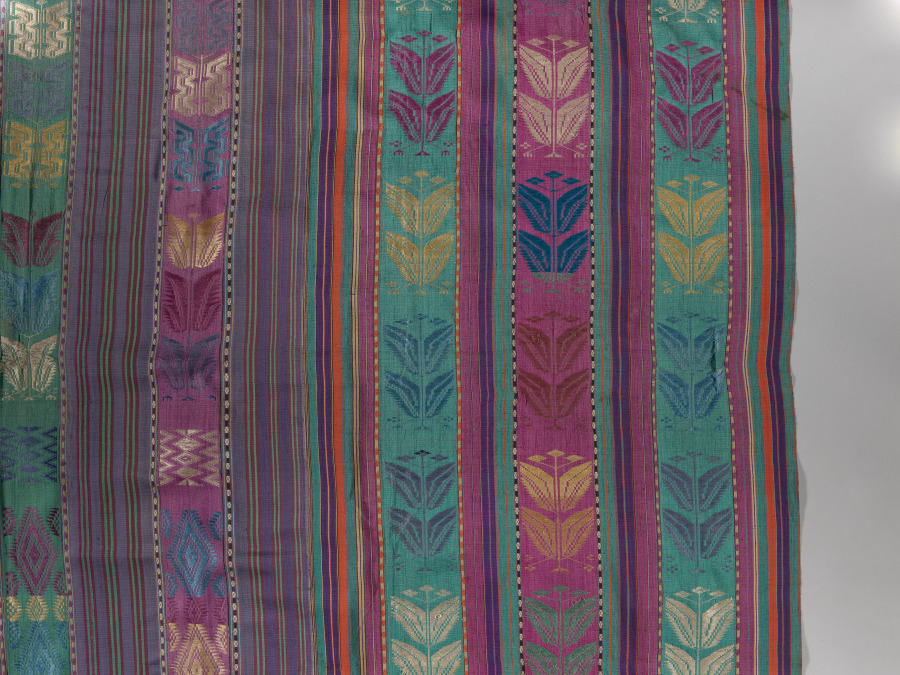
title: Wrapper (Lamba Akotifahana)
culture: Madagascar, Merina Kingdom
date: 1800s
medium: Silk (Bombyx mori)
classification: Textile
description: A lamba is an untailored textile worn by all ages, classes, and genders across much of Madagascar. The lamba akotifahana takes its name from the weft-float motifs (akotifahana) that adorn it. Weavers added extra weft (horizontal) threads to make them. Representing the final production of lamba akotifahana during the Merina Kingdom before French colonization (1897), this example is densely covered with motifs.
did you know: The motifs on this weaving are not symbolic; the weaver chose them for aesthetic reasons.